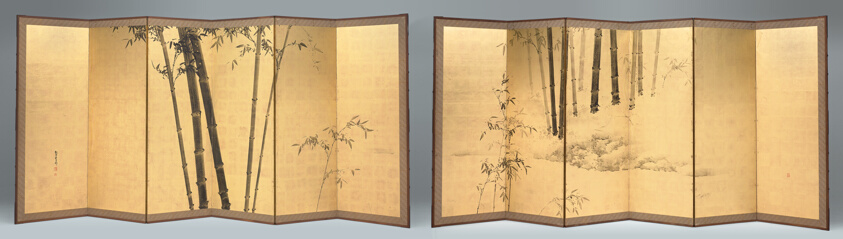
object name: Painting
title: Bamboo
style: Japanese (culture or style)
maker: Kishi Ganku (Japanese, 1749-1838)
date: early 19th century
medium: Pair of six-panel screens; ink and gold leaf on paper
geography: Japan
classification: painting